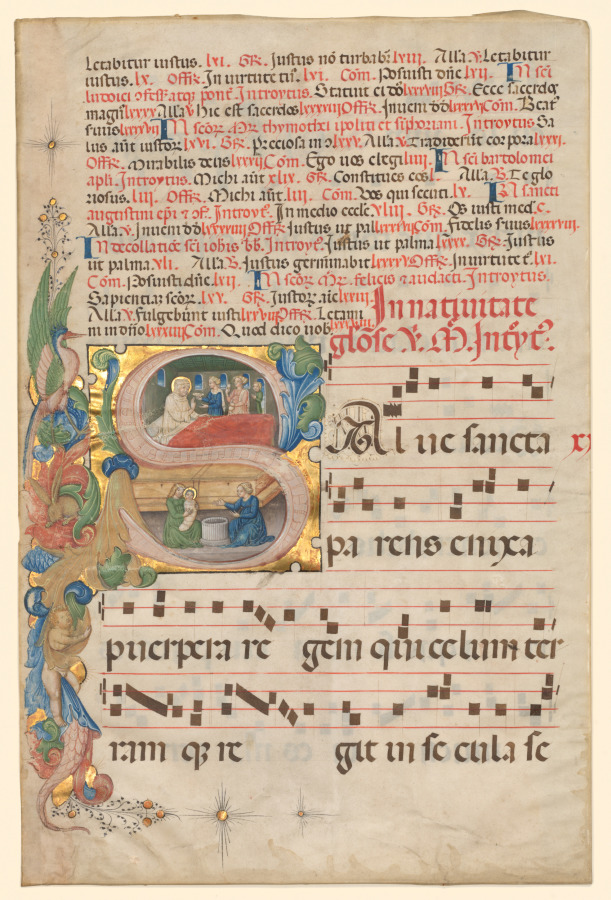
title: Leaf from a Gradual: Historiated Initial S[alve Sancta Parens] with Birth of the Virgin (recto)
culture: Northern Italy, 15th century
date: c. 1420–1450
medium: ink, tempera, and gold on vellum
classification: Manuscript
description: This beautiful leaf is dominated by a large historiated S from which sprays of foliage inhabited by a putto, a rabbit, and a stork extend into the left margin. A scene representing the birth of the Virgin is within the double curve of the S. Saint Anne, the Virgin’s mother, occupies the birthing bed in the upper scene. Below, the infant Mary has been bathed and wrapped in swaddling clothes. In manuscript missals and their musical counterparts, the gradual, votive Masses are generally assigned one to each day of the week with Saturday reserved for the Blessed Virgin. The votive Mass to the Virgin varied from season to season. Three Masses were, therefore, supplied—one for advent, one to be used from Christmas to purification, and a third, represented by this leaf, to be used from purification to advent. This text reads: Salve sancta parens (“Hail Holy Parent”) introducing the opening of the Introit for the Saturday votive Mass for the Nativity of the Virgin (September 8) in the liturgical calendar. The identity of the artist remains elusive, as does his precise place of origin. The figure style and ornament suggest a source in North Italy, perhaps in an artistic center such as Pavia, Mantua, or Padua.